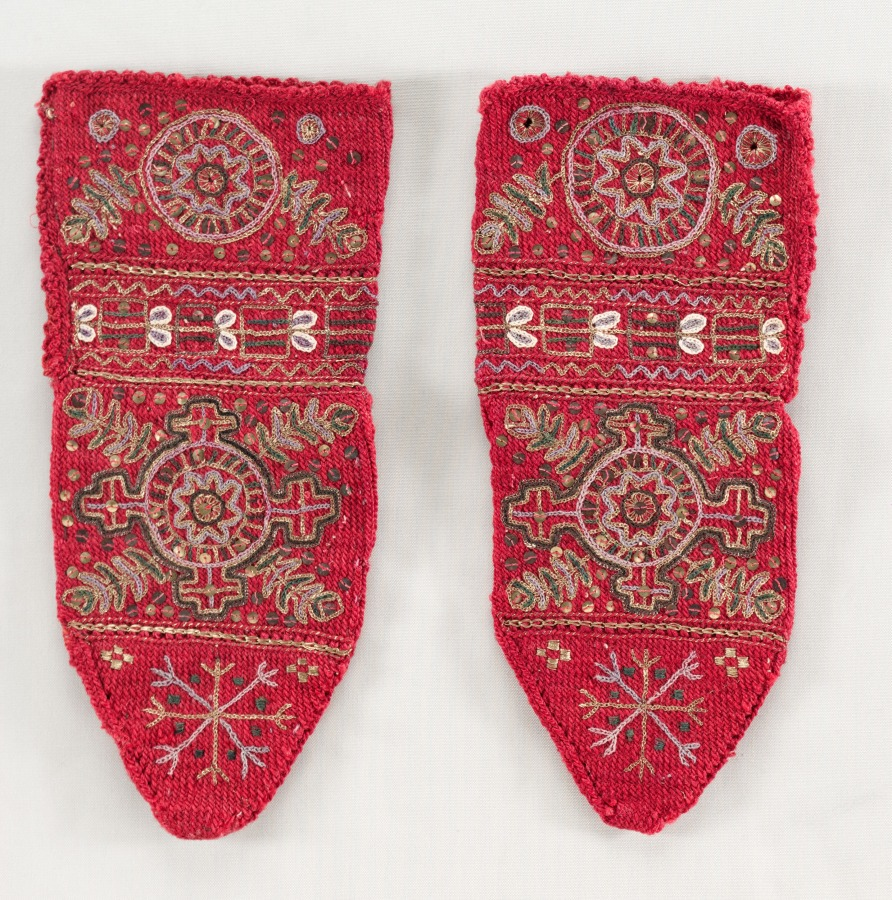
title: Woman's Bridal Socks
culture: Yugoslavia, Serbia, 20th century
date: early 1900s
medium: embroidered wool, gold thread, sequins, knitting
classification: Knitting